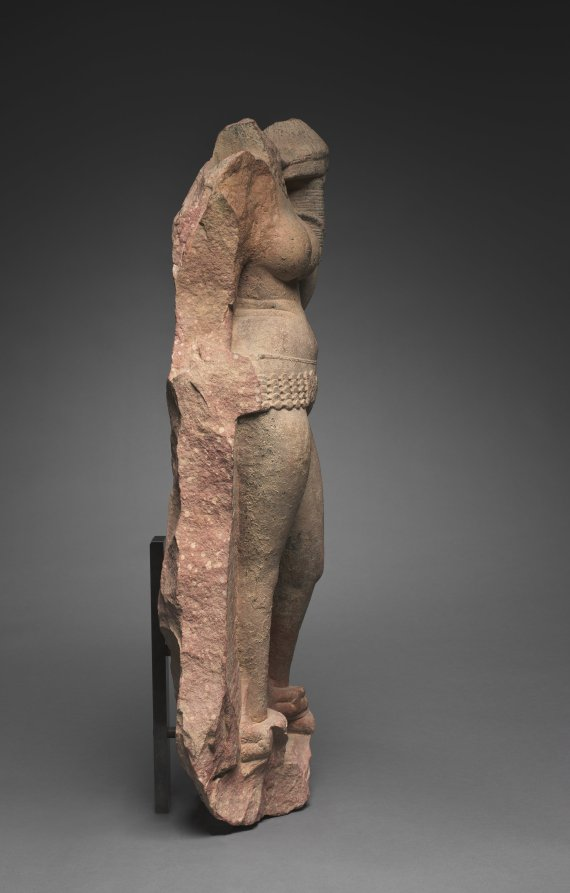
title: Female Devotee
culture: India, Mathura, Kushan period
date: c. early 100s CE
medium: sandstone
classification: Stone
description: This female devotee is depicted approaching the place of worship carrying a covered wicker tray that would have been filled with fresh flower garlands.The sense of dynamism and power in the stance, the masterful transformation of stone into the suppleness of youthful, voluptuous flesh barely interrupted by clothing, as well as touches of naturalism—seen in the slipping of the large bangle down the spiral cuff—are all stylistic characteristics of female figures made during the early 2nd century.